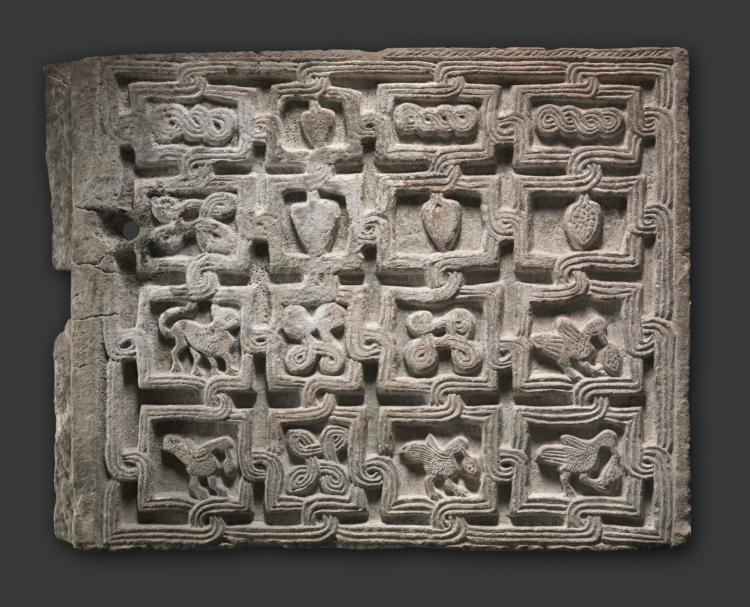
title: Transenna Panel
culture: Lombardic, Italy, Rome, Migration period, 8th-9th Century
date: 700s–800s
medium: marble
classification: Sculpture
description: In Christian architecture a transenna is an openwork screen of stone or metal enclosing a shrine. These transenna elements were found in Rome; the posts were said to have been excavated on the Coelian Hill and may have originally formed part of the transenna of the Church of San Saba. The Lombards were an ancient Germanic-speaking tribe that settled in Italy after 568. Their artistic tradition was originally centered on small objects of personal adornment like buckles and brooches. After occupying Italy, the Lombards found themselves in contact with large-scale sculpture of classical and early Christian origin that, by the end of the 700s, they had learned to adopt and imitate, as seen here.